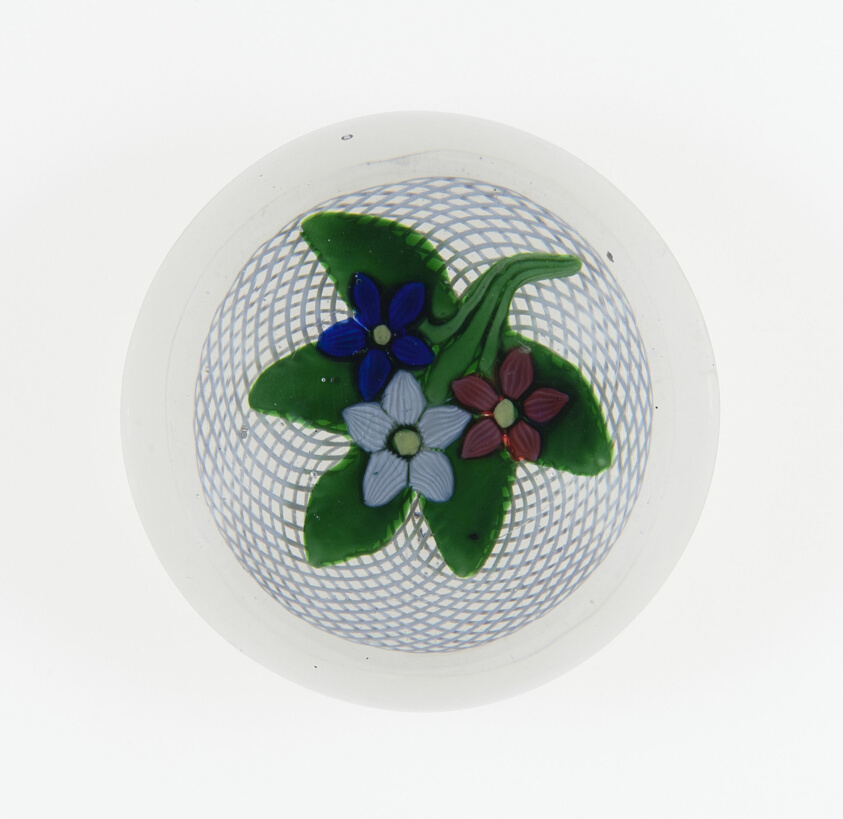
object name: Glass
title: Paperweight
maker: Saint-Louis Glassworks (Cristalleries de Saint-Louis); Lorraine, France, founded 1586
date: c. 1845–60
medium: Glass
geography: Saint-Louis-lès-Bitche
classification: paperweight; glass